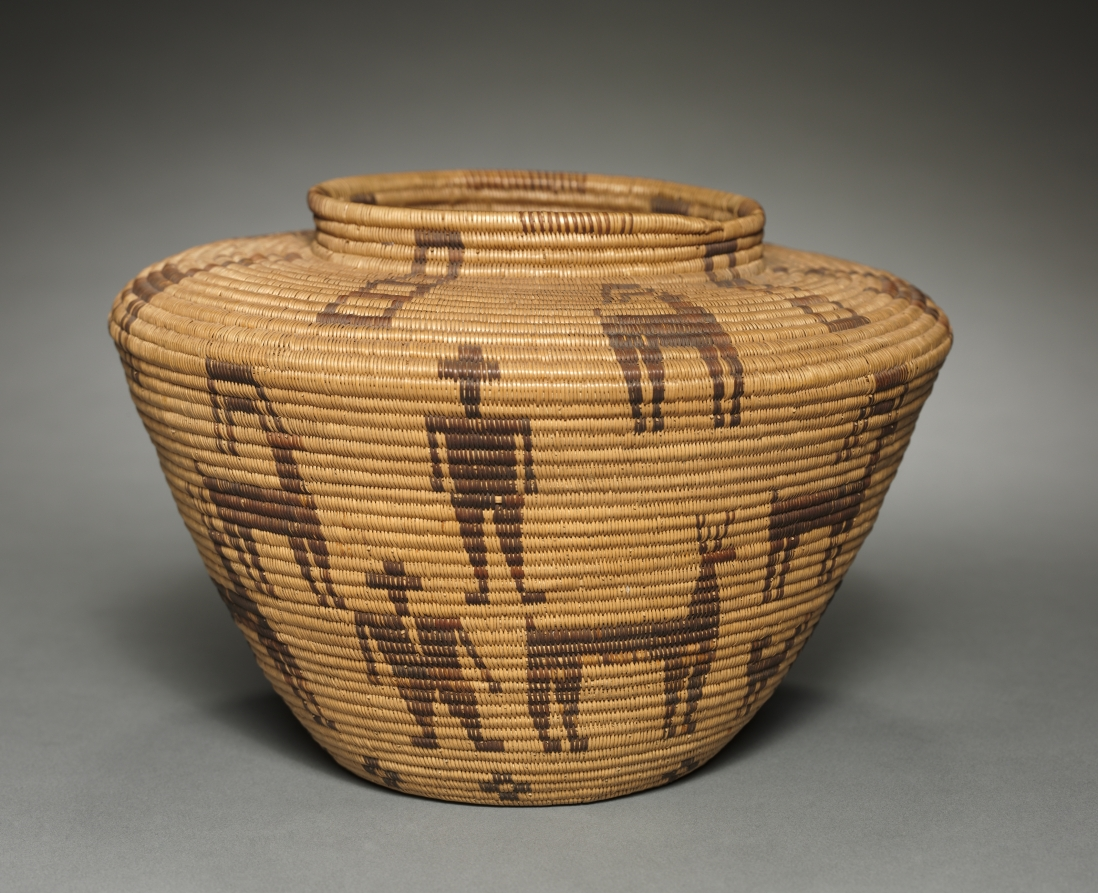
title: Jar-shaped Basket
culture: Native North America, Great Basin, California, Death Valley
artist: Sarah Hunter (Timbisha Shoshone (Panamint), 1883–1967)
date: 1910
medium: Willow, bulrush; coiled (3 rods)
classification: Basketry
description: Sarah Hunter’s basketry is noted for geometricized motifs reminiscent of the animals depicted in petroglyphs on canyon walls in the Death Valley region. Here they include pronghorn mountain sheep, deer, and birds, along with humans, all created in light-brown bulrush against a honey-colored willow ground. Traditional Indigenous basket weavers, who have exhaustive knowledge of the plant world, tend, harvest, and prepare their own materials. If stages of the process are not done properly and at the right time, color will be uneven and stitches will twist and split.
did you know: Some Timbisha Shoshone women continue traditions of basket weaving to the present day.